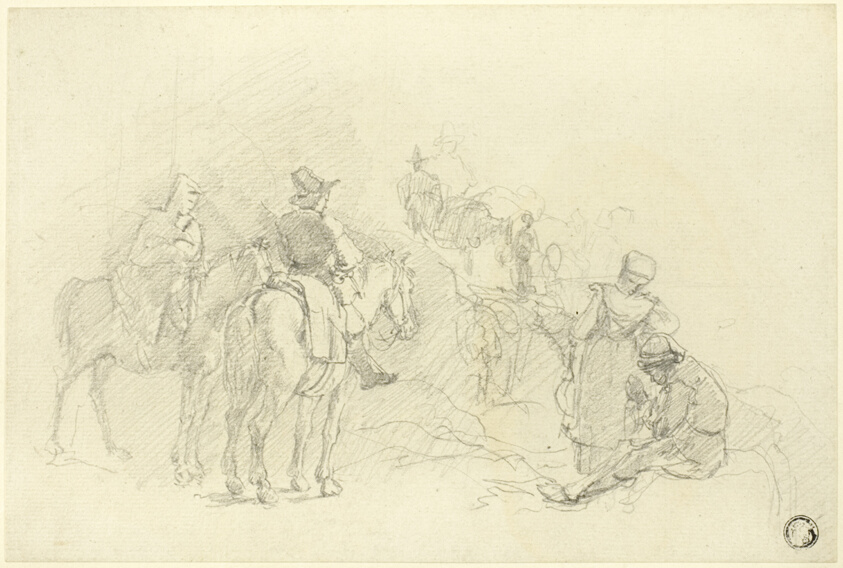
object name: Drawing and Watercolor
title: Resting Travelers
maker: Augustus Wall Callcott (English, 1779-1844)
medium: Graphite on ivory laid paper, laid down on board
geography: England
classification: graphite; drawings (visual works); prints and drawing